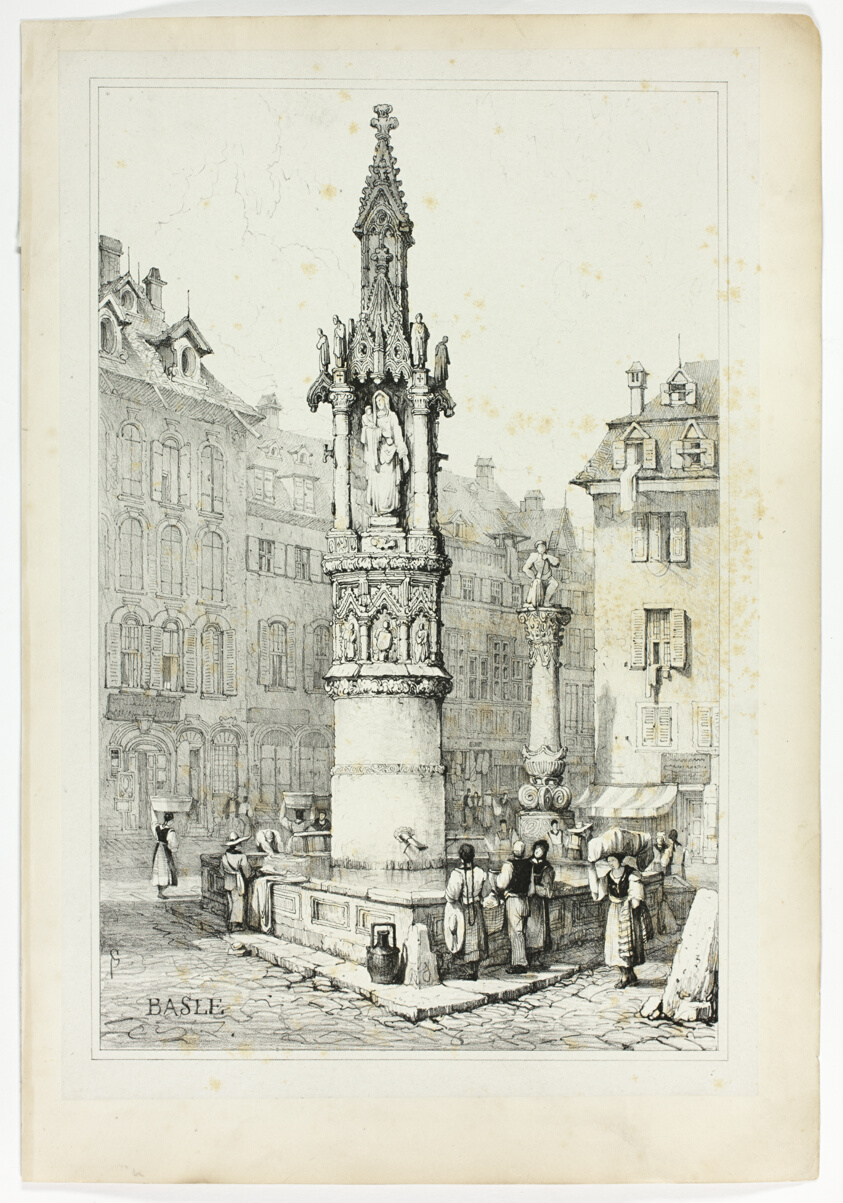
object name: Print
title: Basle, from Facsimiles of Sketches made in Flanders and Germany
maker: Samuel Prout (English, 1783-1852); printed by Charles Joseph Hullmandel (English, 1789-1850)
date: 1833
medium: Lithograph in black on grayish-ivory chine, laid down on ivory wove paper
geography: England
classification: lithograph; print; prints and drawing